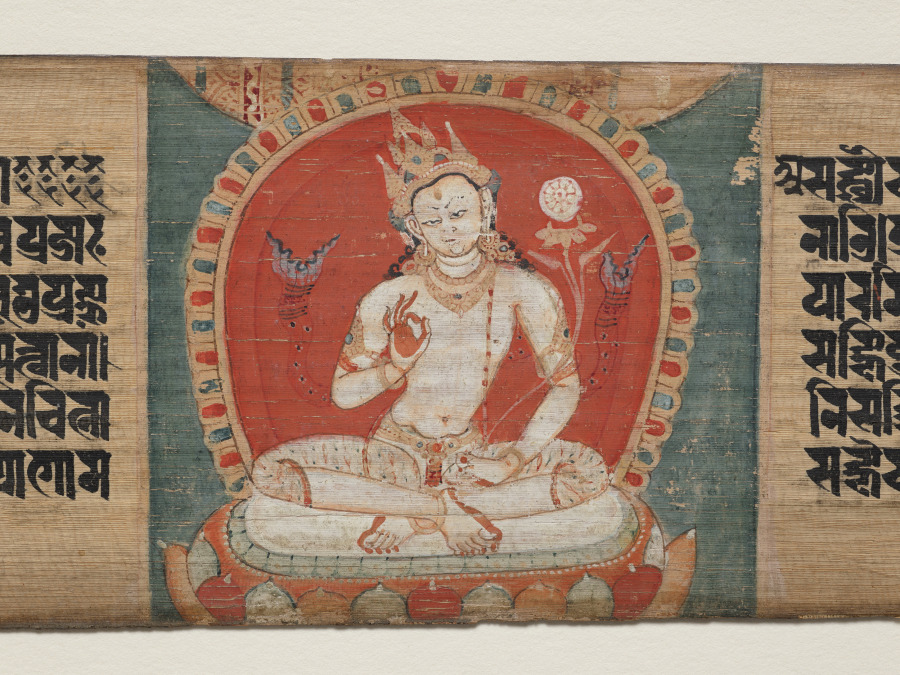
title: Prajnaparamita flanked by a white female figure and a white bodhisattva, folio 90 (recto), from a Manuscript of the Perfection of Wisdom in Eight Thousand Lines (Ashtasahasrika Prajnaparamita-sutra)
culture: Eastern India, Bihar, Vikramashila Monastery. Painting: Nepal, Kathmandu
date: Sunday, September 14, 1119 (year 239 of the Newar Samvat in the month of Ashvina)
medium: gum tempera and ink on palm leaf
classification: Painting